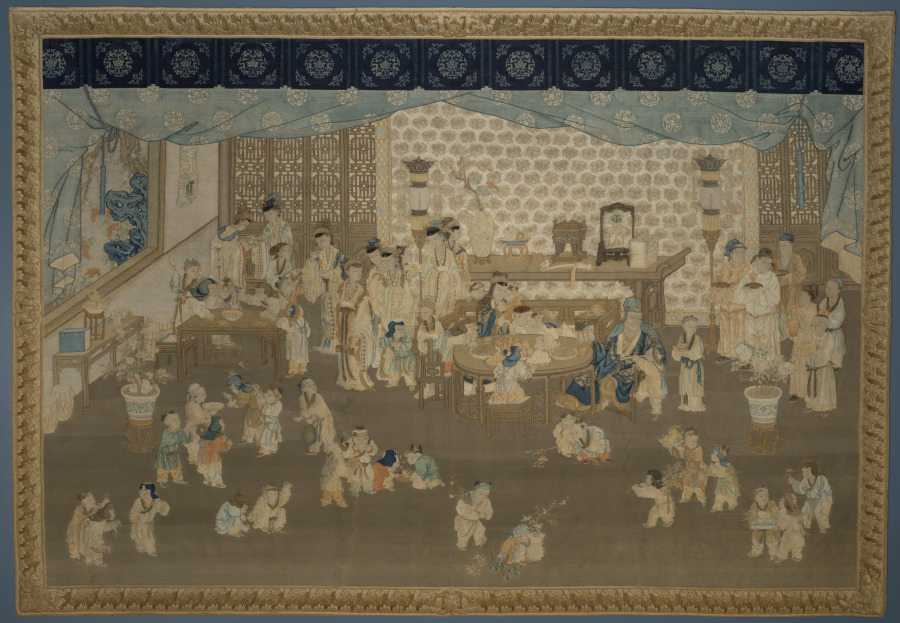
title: Family Gathering on New Year's Morning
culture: China, Qing dynasty (1644-1911)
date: late 1760s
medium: Silk and wool: tapestry weave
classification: Tapestry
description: This European-style tapestry depicts a family gathering, in a woven Western picture frame, that presumably once furnished the Hall of Cultivating the Mind (Yangxin dian) in the Forbidden City. The tapestry employs Western perspective and shading combined with the traditional Chinese subject of a family gathering in a palace, including motifs expressing wishes for good fortune and for a peaceful reign. In 1766, six French tapestries had been presented to the Chinese court. The Qianlong emperor was so intrigued that he commissioned tapestries in the French style from Suzhou. Records mention an imperial order for tapestries in the Western style, such as this one, in 1769, 1770, and 1775.